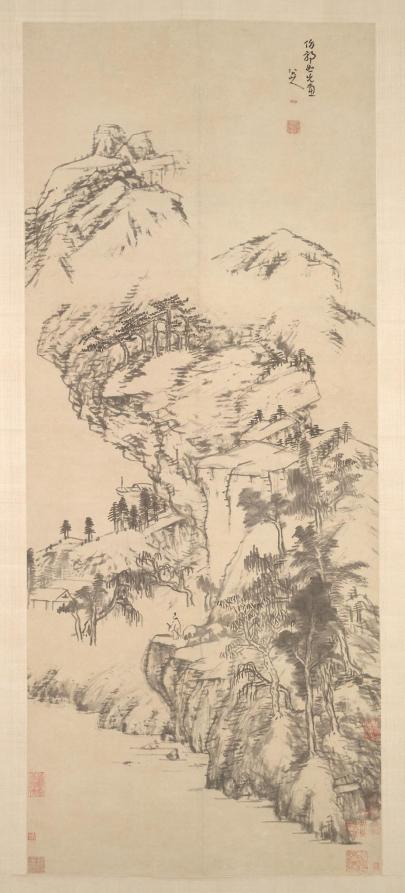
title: Landscape after Guo Zhongshu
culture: China, Qing dynasty (1644-1911)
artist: Bada Shanren (Chinese, 1626–1705)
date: c. 1680–1705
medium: Hanging scroll; ink on paper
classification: Painting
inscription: Artist's inscription, signature, and 3 seals: Painting after Guo Shuxian [Guo Zhongshu]. Bada shanren. [2 seals] Shanren; Kede shenxian 可得神仙. [seal, lower left corner] Yaozhu 遥属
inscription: 8 additional seals: 1 of Li Shifen (1821-1885); 4 of Chang Yüan 張爰 [Zhang Daqian 張大千] (1899-1983); 3 unidentified.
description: Similar to some calligraphers of his time, Zhu Da rejected conventions in favor of an individual, personal expression. He is known for ambiguous compositions of fish, flowers, birds, and rocks in contrasting ink tonality. As a member of the Ming imperial family, Zhu lost his princely status and hid in a monastery when the Manchus, foreigners from the north, established the Qing dynasty in 1644. In this late work, mountain ranges are rendered in diverse and dense strokes rising toward the top of the scroll. It references the artist Dong Qichang (1555–1636) in concept. Yet the cursory brushwork and composition present Zhu’s personal style.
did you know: Zhu Da's inscription acknowledges that this painting was done after the early Song master Guo Zhongshu 郭忠恕, but there is almost no tangible stylistic relation to be found between Zhu Da and his 10th-century model.